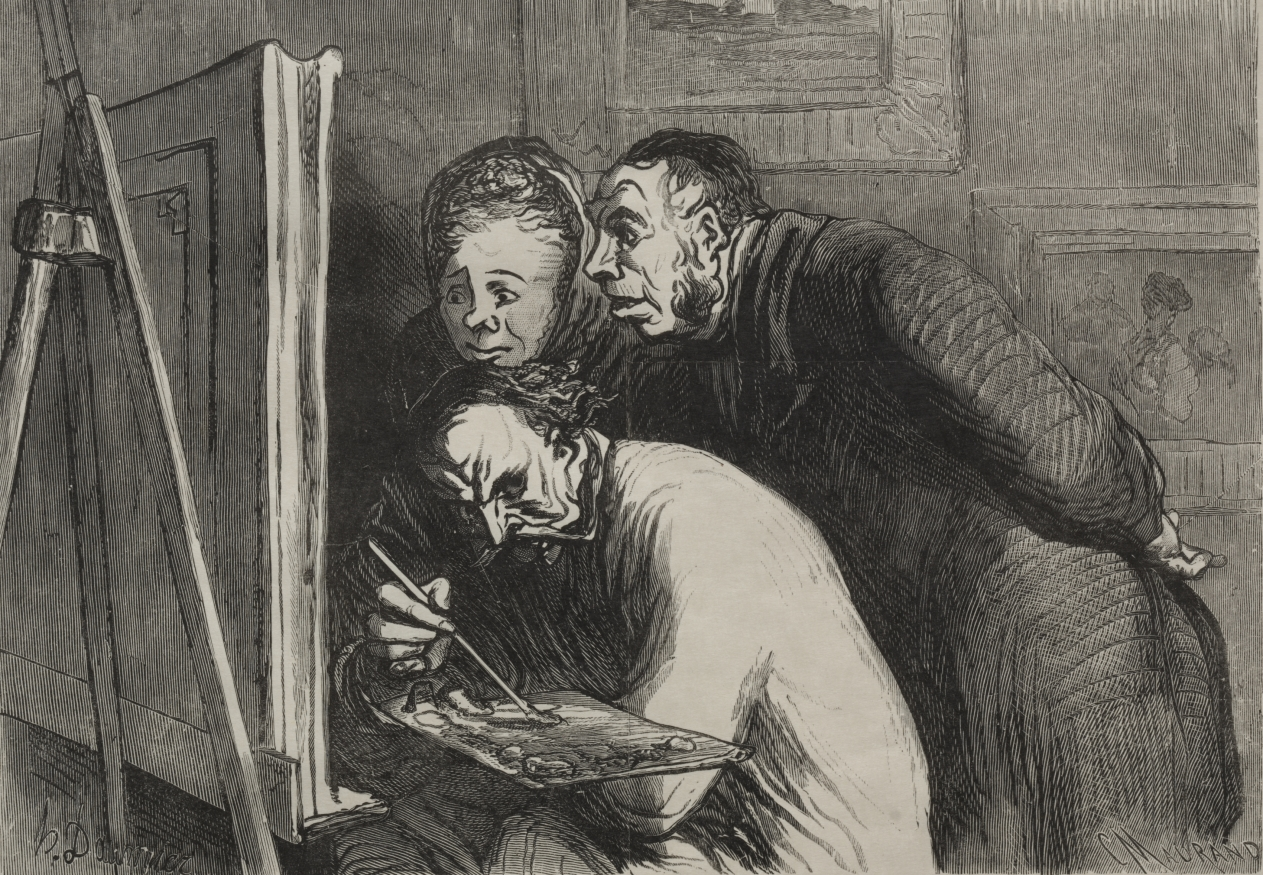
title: Painters and the bourgeois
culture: France, 19th century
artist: Honoré Daumier (French, 1808–1879)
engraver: Charles Maurand (French, 1824–1904)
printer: François Louis Schmied (Swiss, 1873–1941)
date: 1862, printed 1920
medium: wood engraving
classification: Print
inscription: Lower margin, in pencil: 40/75 ; red stamp: FLS